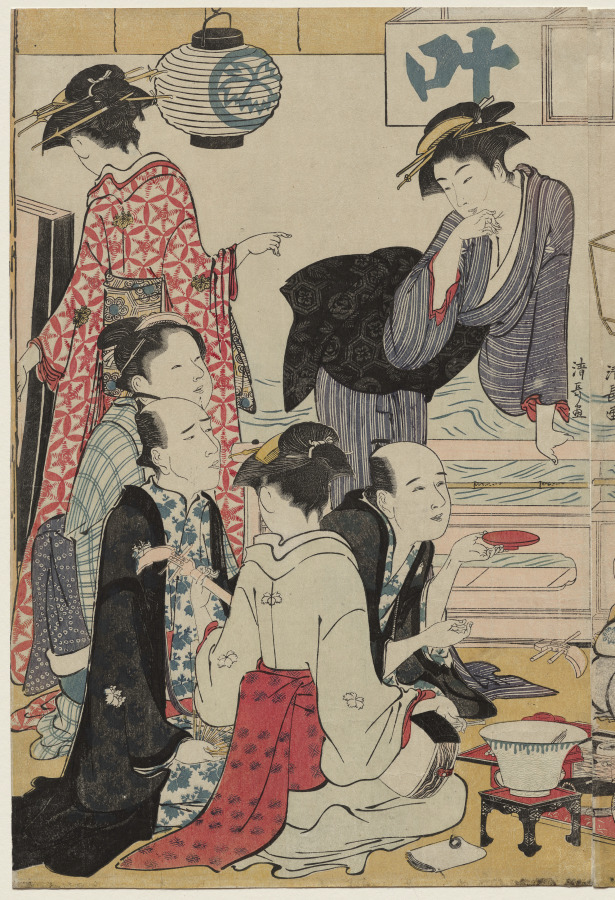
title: Entertainment on a Balcony by the Water at Nakasu, from the series, A Collection of Beautiful Modern Women of the Pleasure Quarters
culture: Japan, Edo period (1615–1868)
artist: Torii Kiyonaga (Japanese, 1752–1815)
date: 1783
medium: diptych: color woodblock print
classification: Print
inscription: Signature: Kiyonaga ga